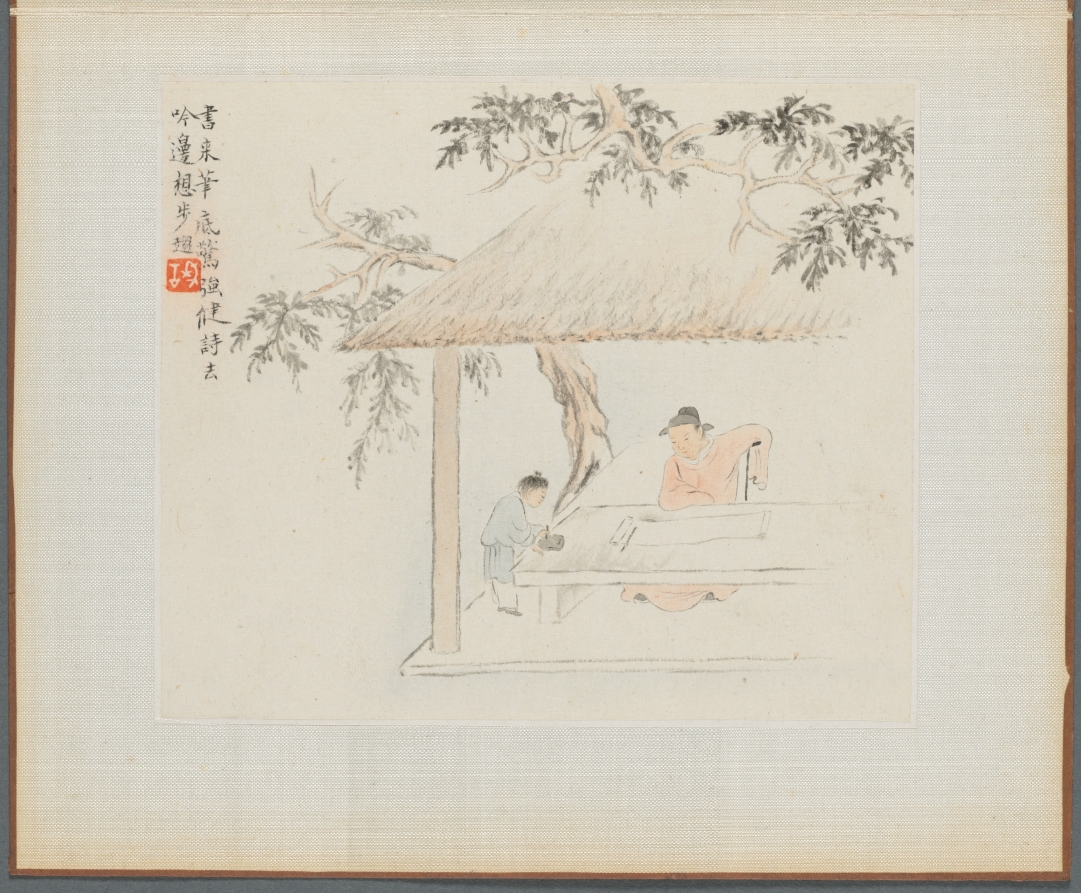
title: Album of Landscape Paintings Illustrating Old Poems: A Scholar at a Table with a Servant aside Preparing the Ink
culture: China, Qing dynasty (1644-1911)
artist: Hua Yan (Chinese, 1682–c. 1765)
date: 1745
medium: Album leaf; ink and light color on paper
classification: Painting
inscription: Calligraphy and seal, upper left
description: Hua Yan is one of the Eight Eccentrics of Yangzhou, who rejected Orthodox ideas about painting.